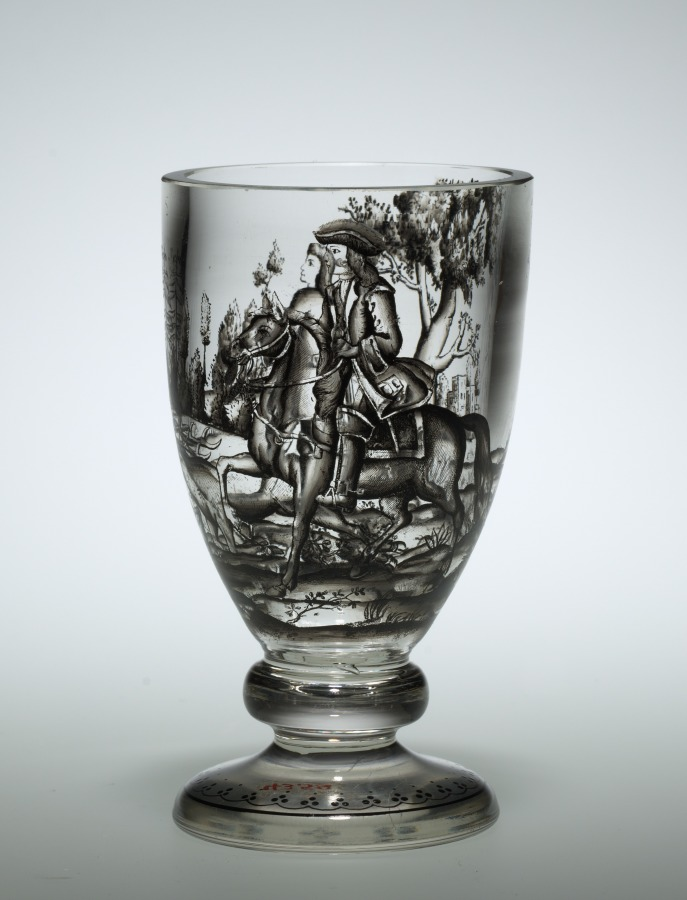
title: Glass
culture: Germany, 18th century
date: c. 1730–1750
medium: glass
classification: Glass